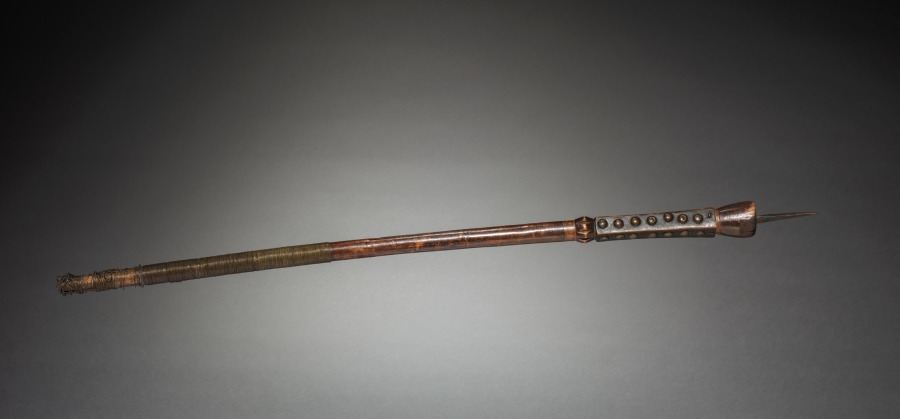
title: Elephant Prod (?)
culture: Africa, Central Africa, Angola, unknown maker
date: early 1900s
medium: Wood, wire, upholstery studs, and metal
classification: Arms and Armor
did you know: In the early twentieth century, museums often collected objects from Africa for their ethnographic––not artistic––value, which is why this tool is in the CMA's collection.